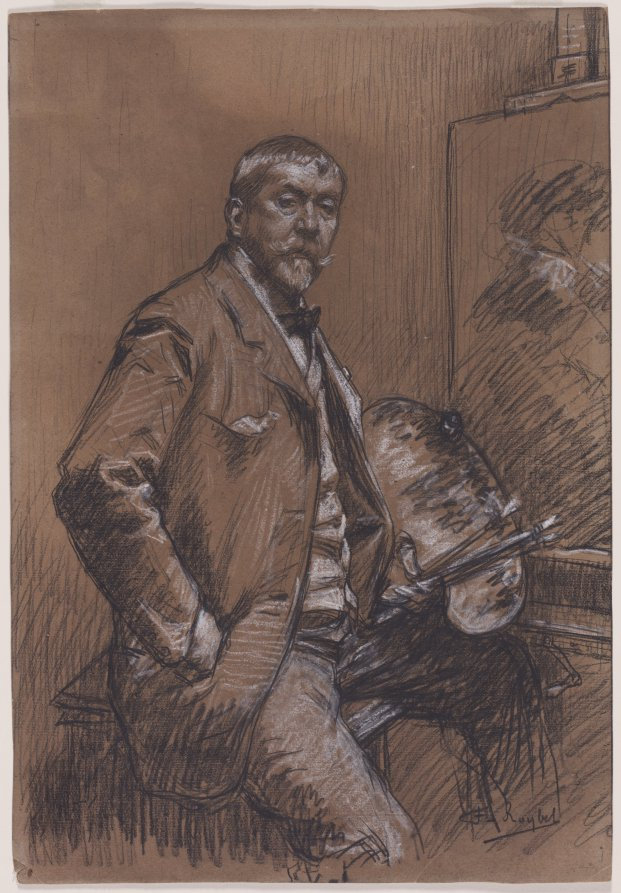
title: Self-Portrait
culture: France, 19th or 20th century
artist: Ferdinand Roybet (French, 1840–1920)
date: 1800s-1900s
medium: black chalk heightened with white chalk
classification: Drawing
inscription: Signed lower right in black chalk: F. Roybet